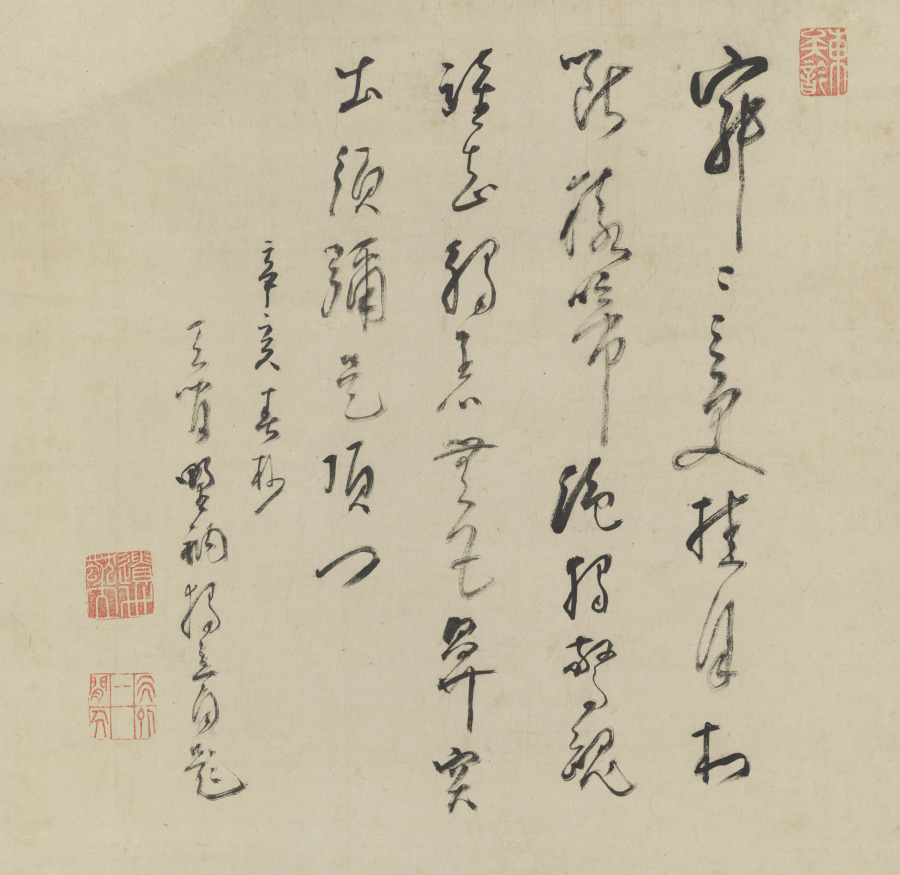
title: Portrait of Duli Xingyi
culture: Japan, Edo period (1615–1868)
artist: Kita Genki (Japanese, active c. 1664–98)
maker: Duli Xingyi (Chinese, 1596–1672)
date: 1671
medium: hanging scroll; ink and color on paper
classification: Painting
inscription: 1671 inscription at top of scroll by Duli Xingyi with three seals, 東矣䪩 (prefatory), 遺世獨立 (top) , 天外一閒人 (bottom); seal of Genki at lower left of painting 元規 .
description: In this portrait, the Ōbaku school Buddhist monk Duli Xingyi (born Tai Li, 1596–1672), whose name is pronounced Dokuryū Shōeki in Japanese, sits upon a woven mat holding a ceremonial scepter known as a ruyi, or nyoi in Japanese. Above his head is an insciption he added to the painting in 1671, the year before his death. It may be translated to read: Contemplative emptiness: the moon suspended over the village at midnight. Suddenly my soul is startled by the howl of an ape. Who could know that it would arouse me beyond my senses, and bring me an inner vision from Mt. Sumeru. (translated by Stephen Addiss and Kwan S. Wong) Originally from what is now the city of Hangzhou in China, Duli emigrated to Japan in 1653, where he took monastic vows. His skills in calligraphy and seal carving were formidable. Painter Kita Genki combined Chinese brush styles he learned in Nagasaki with Western painting techniques to capture Duli's likeness.